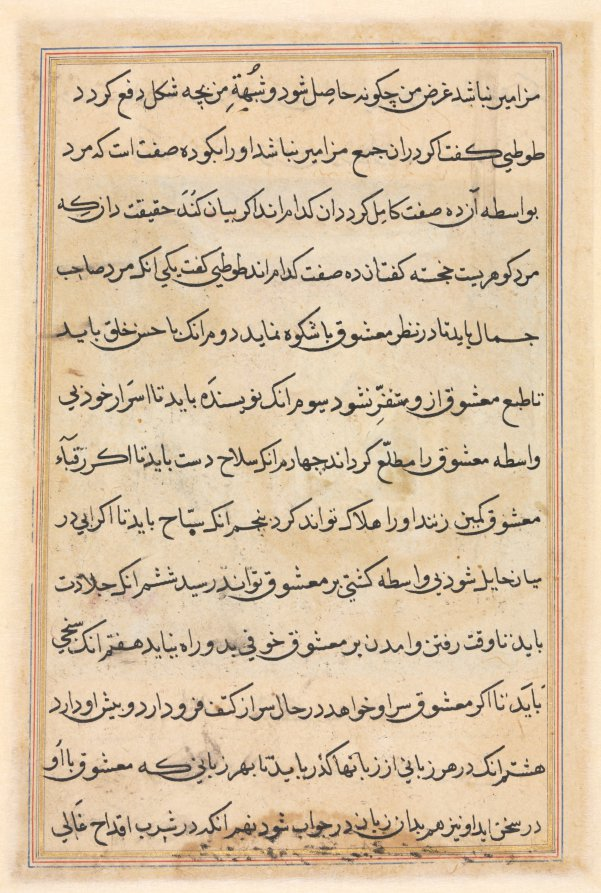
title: Page from Tales of a Parrot (Tuti-nama): text page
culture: Mughal India, court of Akbar (reigned 1556–1605)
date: c. 1560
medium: gum tempera, ink, and gold on paper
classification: Painting